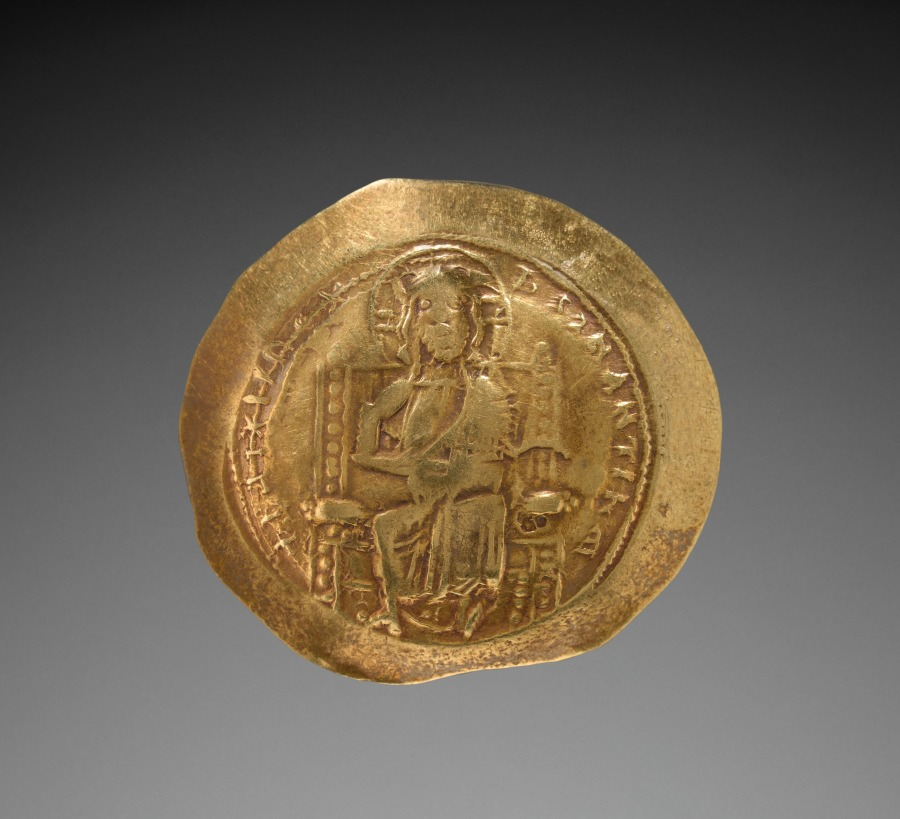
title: Scyphate Histamenon of Constantine X (reverse)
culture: Byzantium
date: 1059–1067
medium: gold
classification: Coins